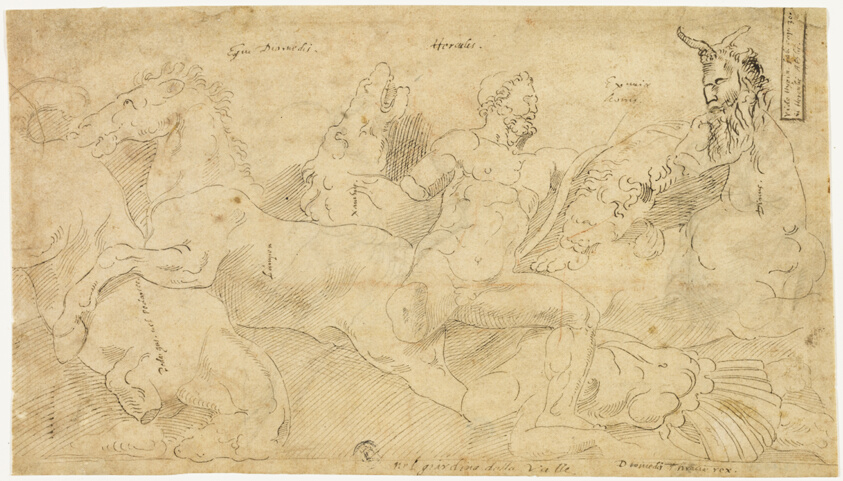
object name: Drawing and Watercolor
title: Ancient Relief with Hercules and the Mares of Diomedes (recto); Two Sketches: Draped Satyr and Winged Female Figure (verso)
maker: After Girolamo Sellari, called Girolamo da Carpi; Italian, 1501-1556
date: 1521/56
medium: Pen and brown ink, with traces of red chalk (recto), and pen and brown ink (verso), on tan laid paper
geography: Italy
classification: pen and ink drawings; drawings (visual works); prints and drawing